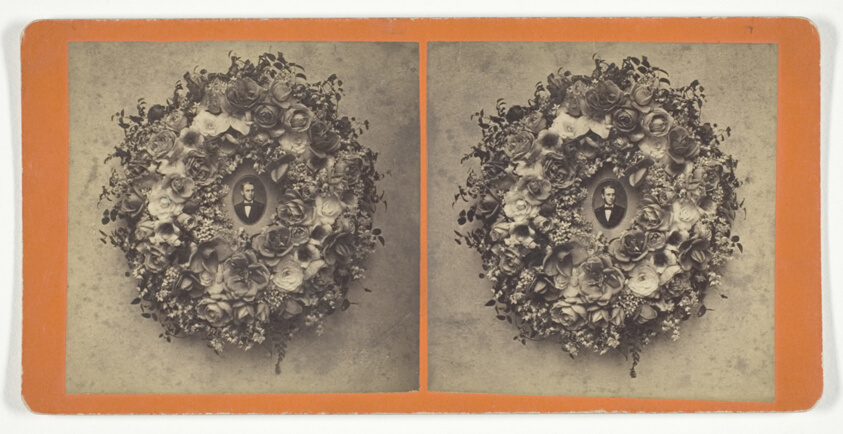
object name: Photograph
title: Untitled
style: 19th century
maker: Frank Lawrence (American, active late 19th century)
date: 1879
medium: Albumen print, stereo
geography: Worcester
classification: photography; photograph